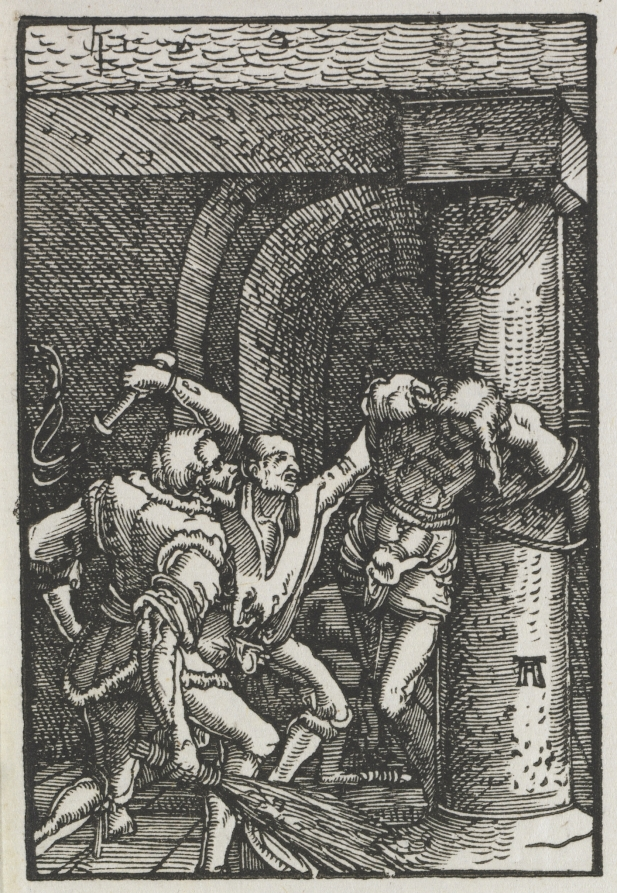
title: The Fall and Redemption of Man: Flagellation of Christ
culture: Germany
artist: Albrecht Altdorfer (German, c. 1480–1538)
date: c. 1515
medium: woodcut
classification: Print